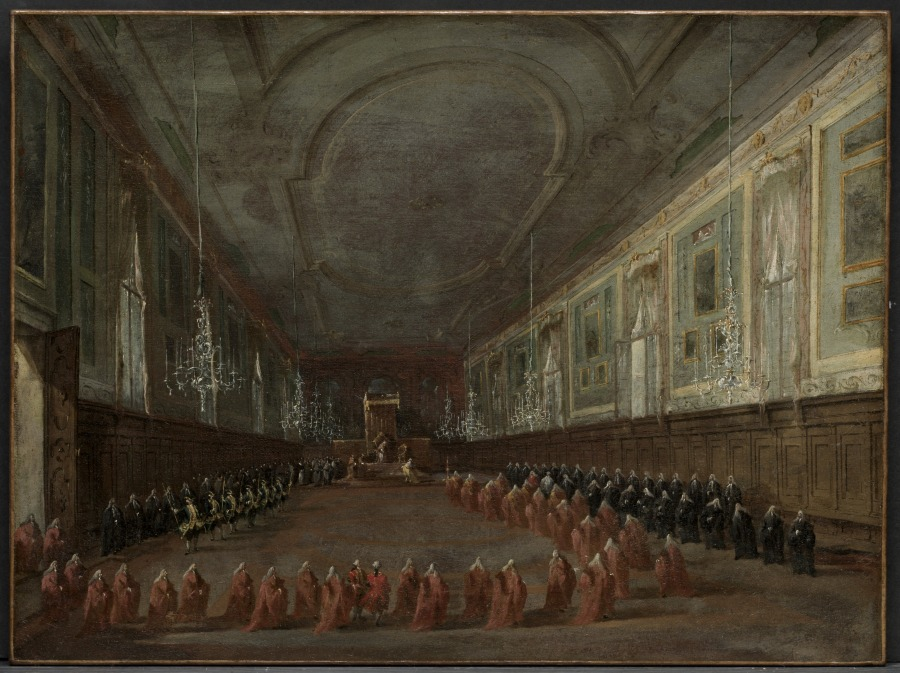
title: Pope Pius VI Descending the Throne to Take Leave of the Doge in the Hall of SS. Giovanni e Paolo, 1782 and Pontifical Ceremony in SS. Giovanni e Paolo, Venice, 1782 (pair)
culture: Italy, 18th century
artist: Francesco Guardi (Italian, 1712–1793)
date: c. 1783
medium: oil on canvas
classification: Painting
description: From May 15-18, 1782, Pope Pius VI Braschi was in Venice, the only papal visit during the eighteenth century, an event celebrated with great festivities. Francesco Guardi (1712-1793), a native Venetian, was one of the most celebrated scenic painters of the eighteenth century, and specialized in depictions of cityscapes and the pomp and pageantry of Venetian ceremonial life. To celebrate the momentous occasion, the Englishman Peter Edwards commissioned four large scenes of the Pope's visit. The museum's two smaller paintings represent copies of the popular subject, which Guardi copied either for the open market or for other patrons. The Pontifical Ceremony (Te Deum) depicts the musical performance of Te Deum, a prayer of thanksgiving set to music by Antonio Vivaldi (1678-1741), a famous Venetian Baroque composer. Te Deum was a traditional hymn recited in thanks to God for a special blessing, including a papal election or a royal coronation, and was appropriate for the historic papal visit. In the Reception of the Doge and Senate, the Doge, the elected prince of Venice, and Senators of the Venetian Republic process towards the throne, as the pope blesses the multitude of government leaders.